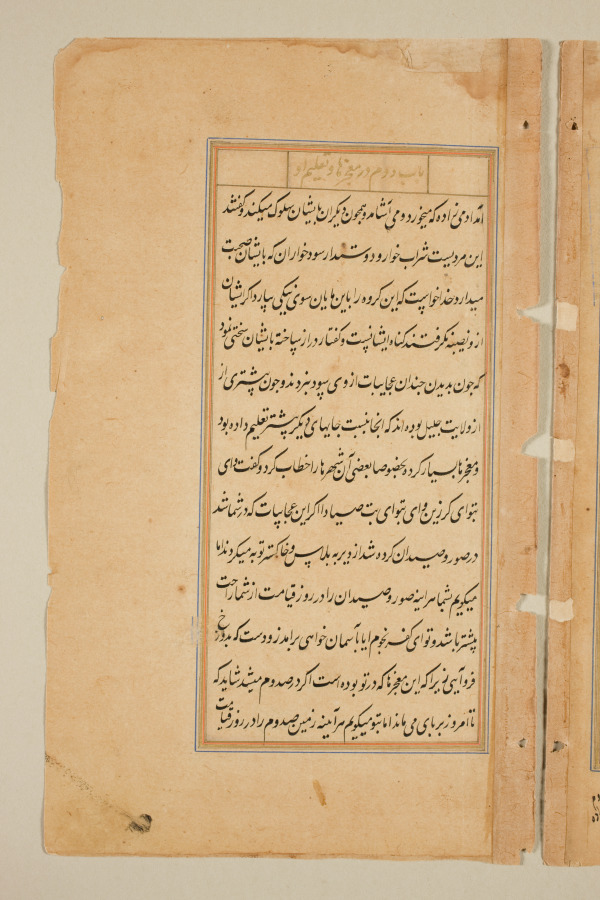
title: Text page from a Mirror of Holiness (Mir’at al-quds) of Father Jerome Xavier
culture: Mughal India, Allahabad, made for Prince Salim (1569–1627)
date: 1602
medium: Ink and gold on paper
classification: Manuscript